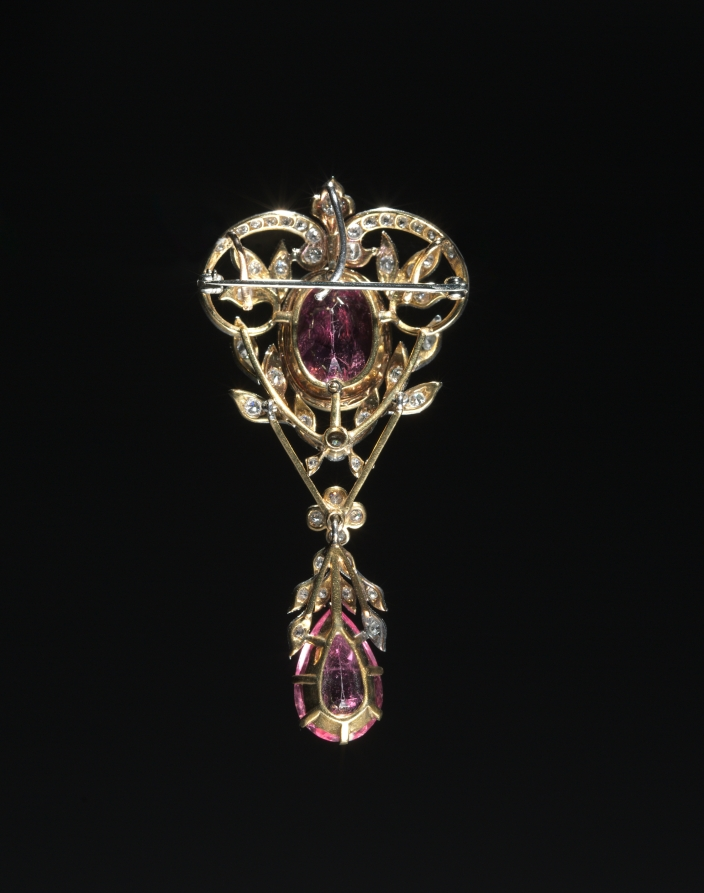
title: Pendant Brooch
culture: America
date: c. 1890–1910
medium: pink tourmaline, diamonds, gold, platinum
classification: Jewelry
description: Brightly colored gemstones, paired with diamonds, were quite fashionable during the Gilded Age because of their ability to coordinate well with the myriad colors of silk fabric used to make formal dresses at the time. They were also prized for their size and depth of color. This pendant brooch provides a traditional setting typical of the period in which two large tourmalines are surrounded by a halo of white diamonds.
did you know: Around 1900, pink tourmalines were most often found in Maine and California.